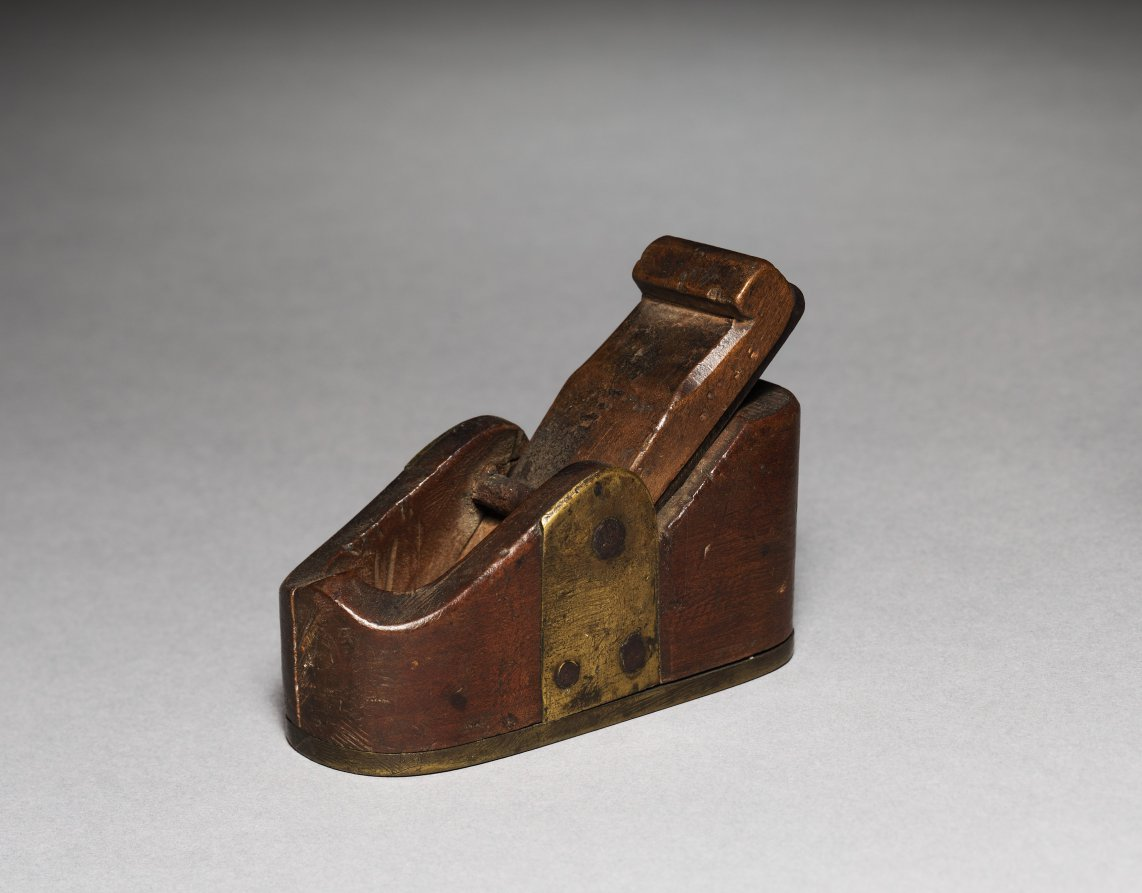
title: Plane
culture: Europe, 18th century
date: 1700s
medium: wood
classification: Tool